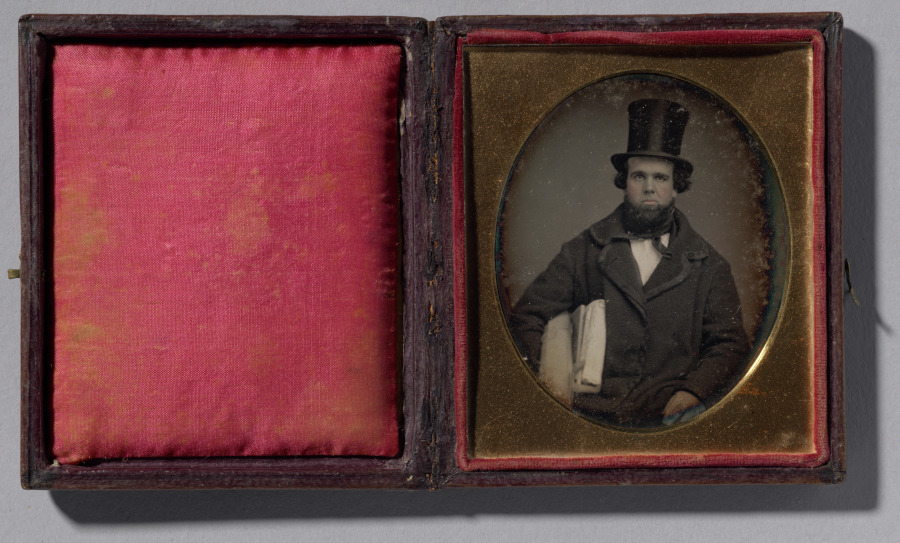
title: Architect with his drawings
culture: America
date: c. 1850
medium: daguerreotype, sixth plate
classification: Photograph